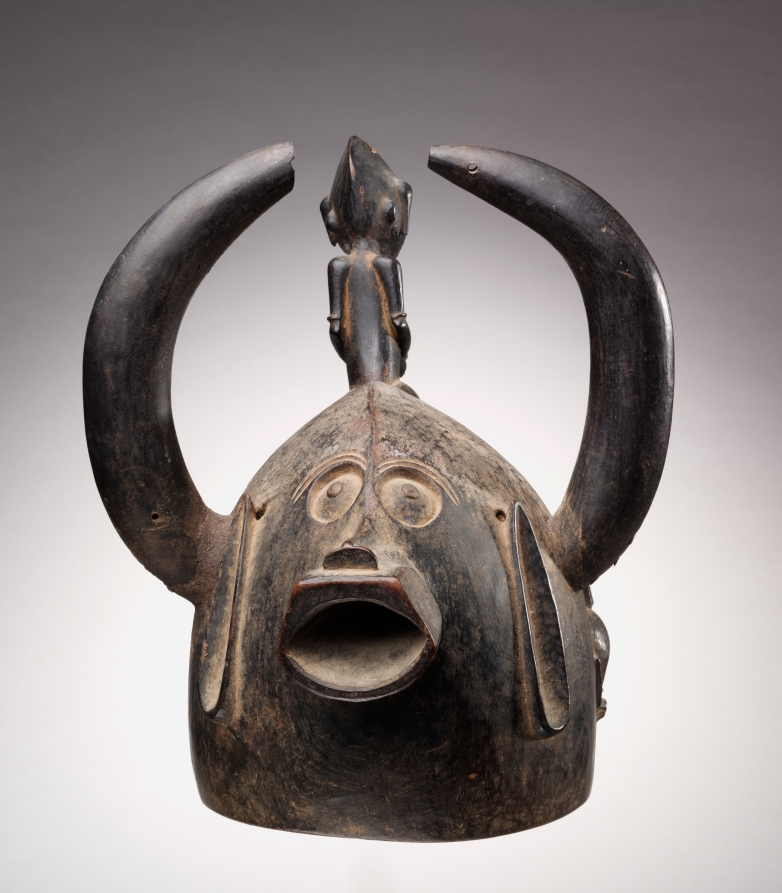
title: Helmet Mask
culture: Africa, West Africa, Côte d'Ivoire, Senufo-style carver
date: early to mid-1900s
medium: Wood, upholstery studs, and colorant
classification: Mask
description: This type of helmet was worn in rituals demonstrating a boy’s transition from one age group to the next, prior to his actual initiation into the secret Poro society. The pre-initiates were viewed as unknowing and anxious oxen, so the horns on such helmets may refer to those of horned cattle. The female figure alludes to women’s supernatural powers, which assure the welfare of Poro members.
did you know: Cowrie shells, feathers, and other accessories once decorated this helmet.